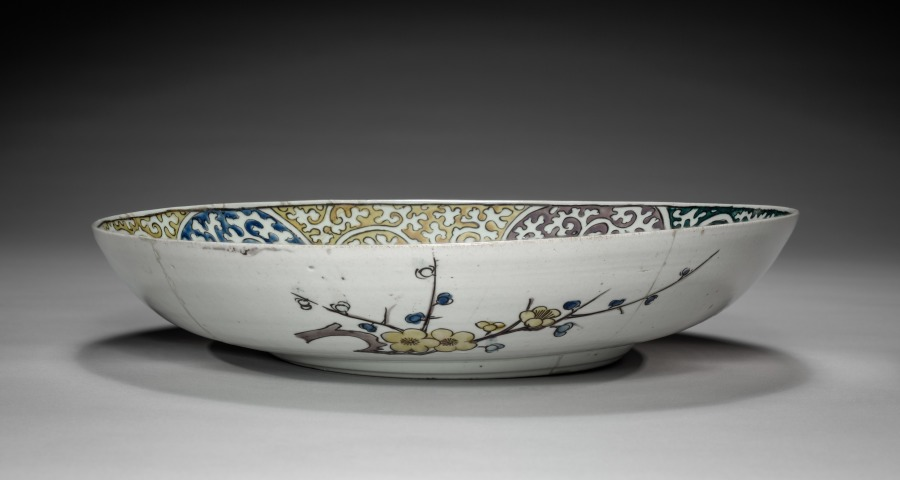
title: Plate with Bird and Flower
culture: Japan, Meiji period (1868–1912) or Taishō period (1912–26)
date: early 1900s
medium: Porcelain with overglaze enamel (Ko-Kutani revival style)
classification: Ceramic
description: This dish is a sophisticated example of later ceramists reinterpreting earlier styles of Japanese porcelain. The colors and patterns used look similar to some works produced on the island of Kyushu in the1600s and 1700s. However, the idea to combine alternating blocks of yellow, green, purple, and blue with a "Chinese grasses" (karakusa) pattern around the rim of the dish is one hit upon in the early 1900s by an artist familiar with the colors and patterns of earlier works.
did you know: Porcelain must be fired at a high temperature to achieve its strength and semitranslucent surface.